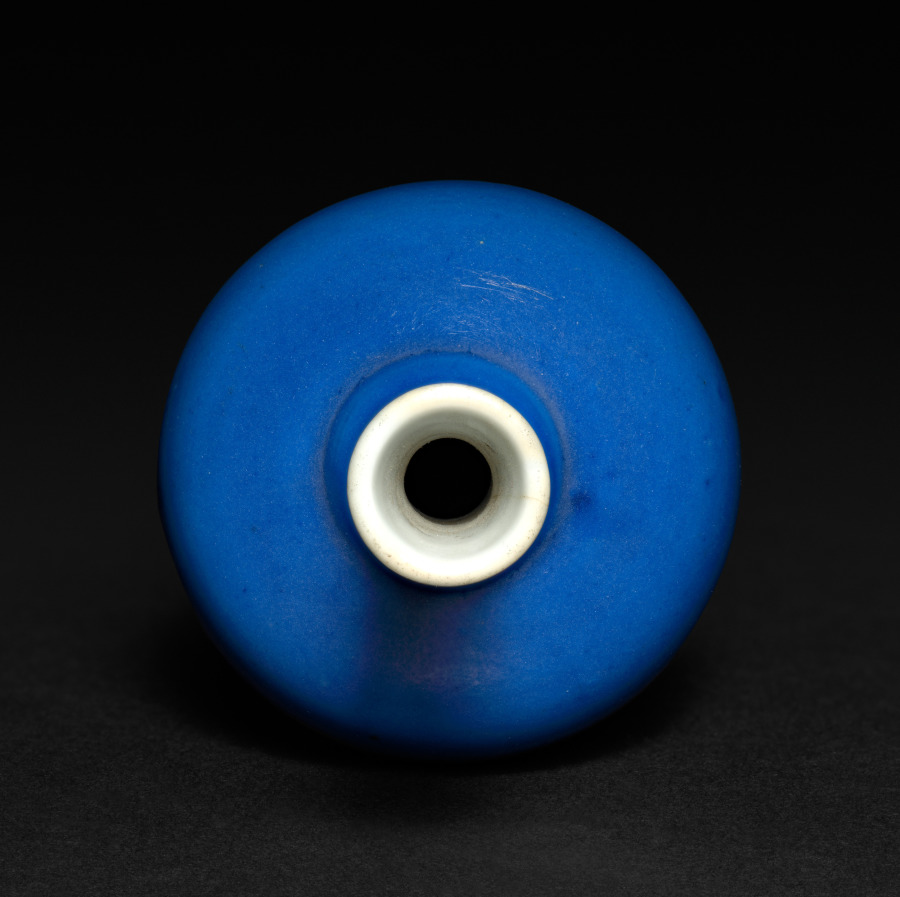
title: Miniature Vase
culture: China, Qing dynasty (1644-1911), Kangxi reign (1662-1722)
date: 1662–1722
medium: porcelain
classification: Ceramic